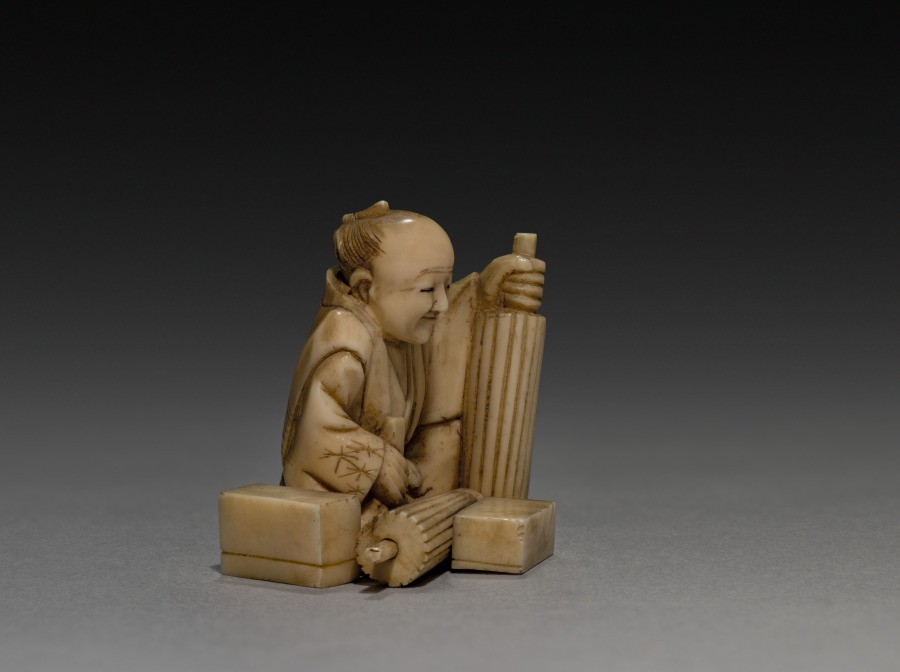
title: Parasol Vendor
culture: Japan, Meiji period (1868–1912)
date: late 1800s-early 1900s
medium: ivory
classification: Ivory